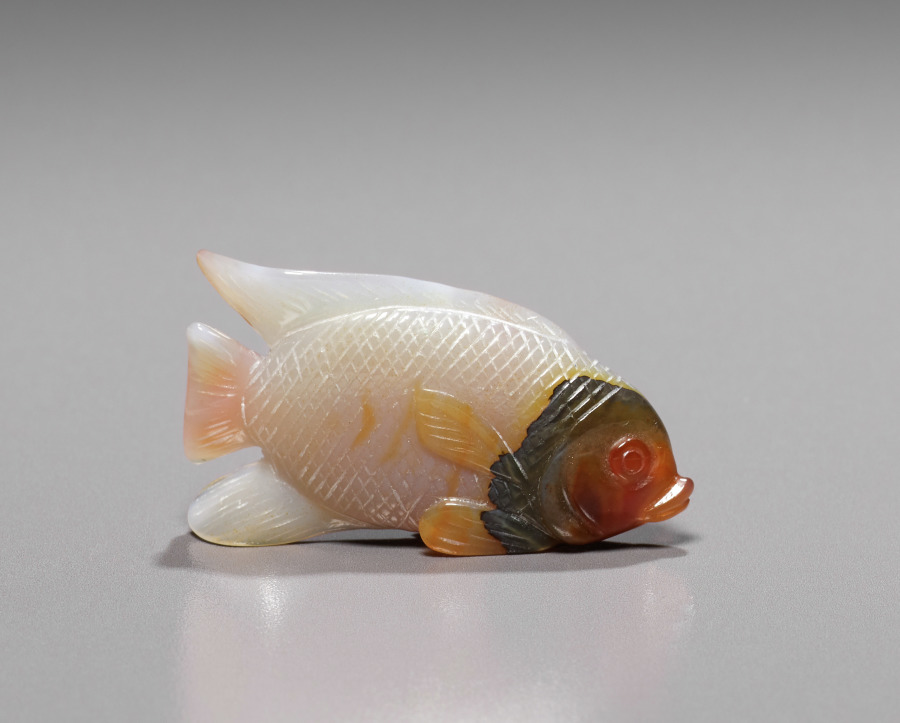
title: Fish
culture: Russia, St. Petersburg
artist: House of Fabergé (Russian, 1842–1918)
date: c. 1890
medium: agate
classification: Miscellaneous